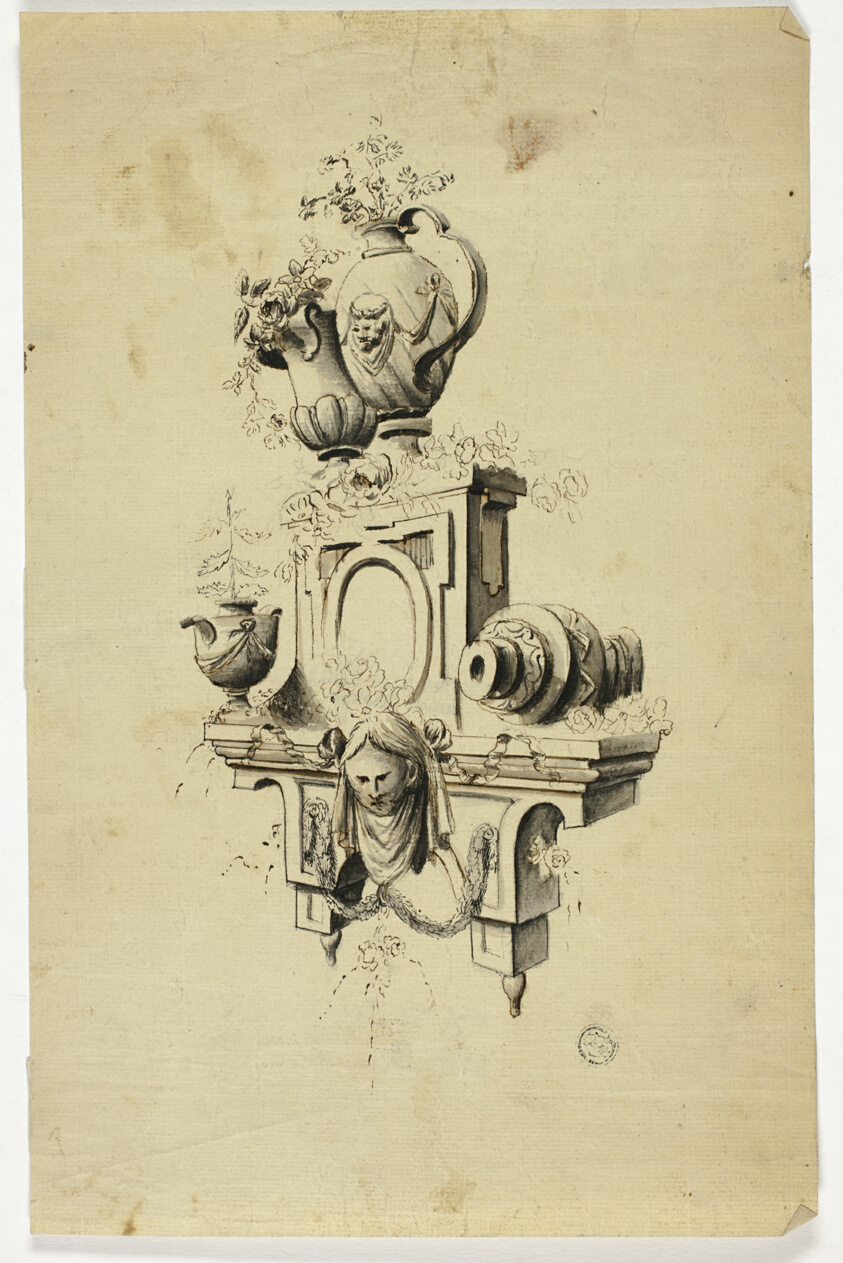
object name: Drawing and Watercolor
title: Design for a Chimney Piece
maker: Unknown Artist; Italian, 1700-1799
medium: Pen and black and brown ink with brush and gray wash, on tan laid paper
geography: Italy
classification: pen and ink drawings; drawings (visual works); prints and drawing